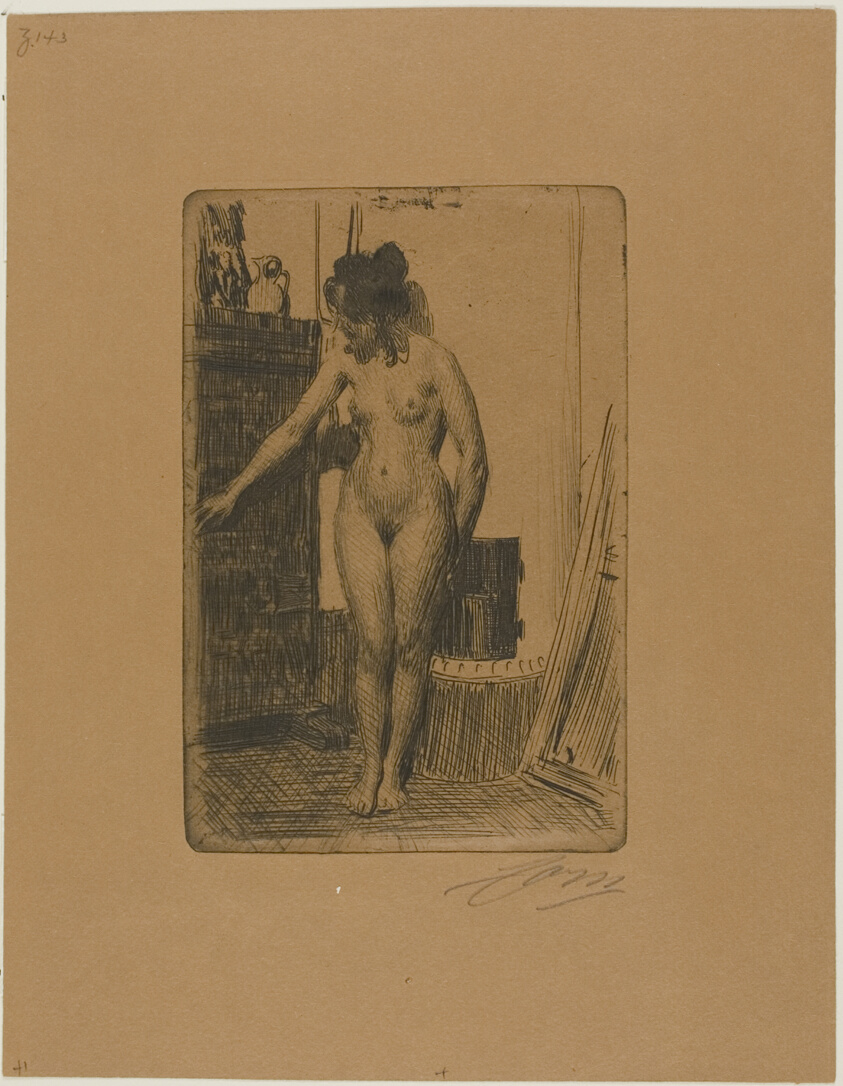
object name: Print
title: Before the Stove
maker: Anders Zorn (Swedish, 1860-1920)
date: 1903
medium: Etching on red-brown paper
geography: Sweden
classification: etching; print; prints and drawing